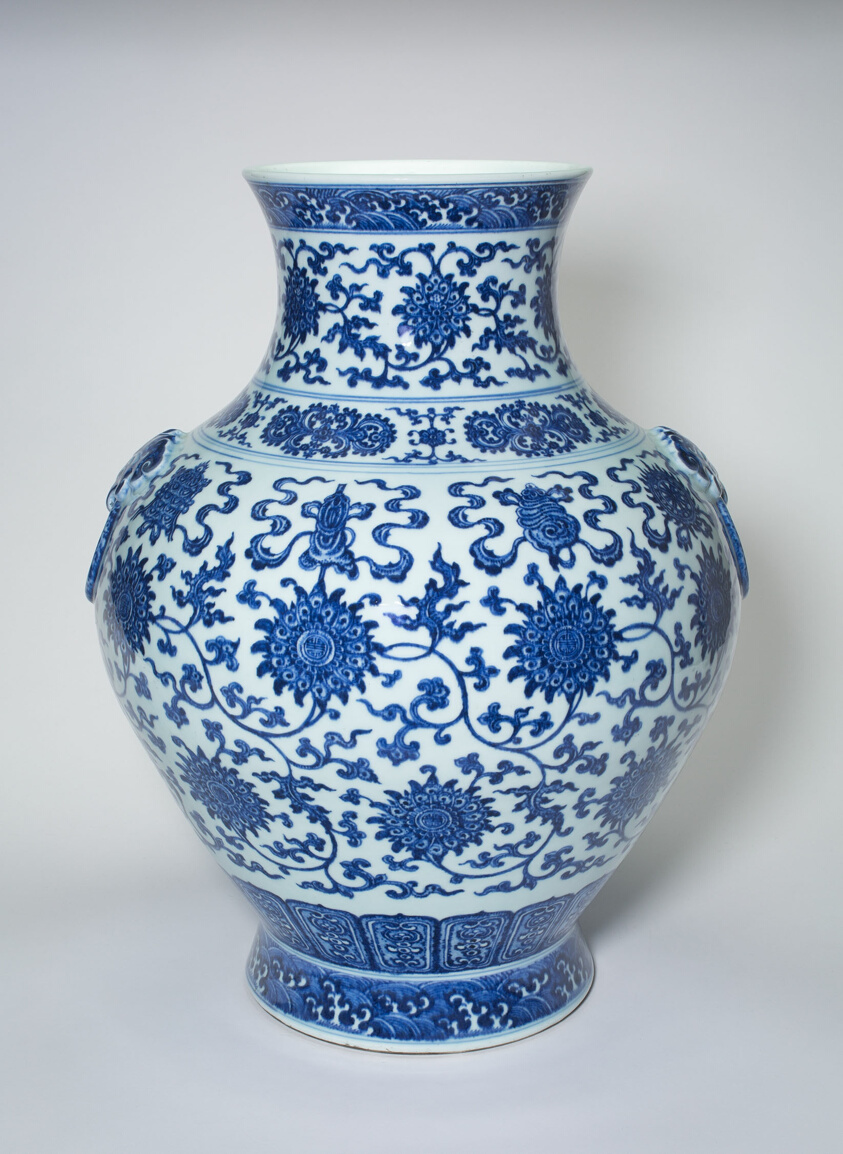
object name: Vessel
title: Vase with Loop Handles, Peony Scrolls, Eight Buddhist Emblems, and Waves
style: Chinese (culture or style)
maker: China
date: Qing dynasty (1644–1911), Qianlong reign mark and period (1736–1795)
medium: Porcelain painted in underglaze blue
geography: China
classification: vase; porcelain; vessel; asian art; ceramics